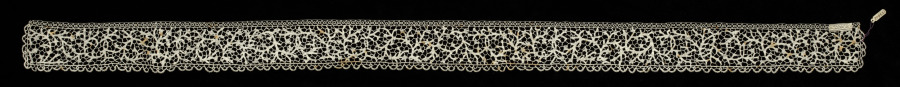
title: Fragment of Lace Edging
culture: Italy, Venice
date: 1660–99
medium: Needle lace (Punto Corallina)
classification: Lace